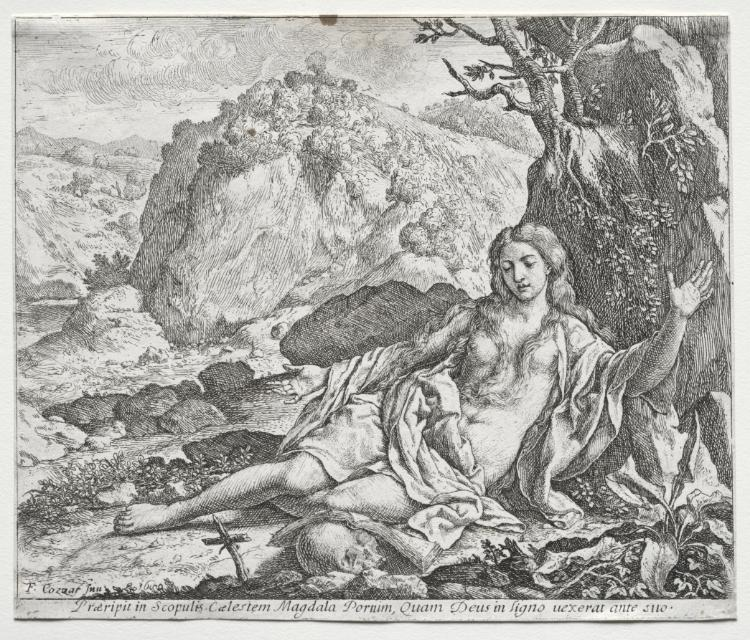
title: The Penitent Magdalen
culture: Italy, 17th century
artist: Francesco Cozza (Italian, 1605–1682)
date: 1650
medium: etching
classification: Print